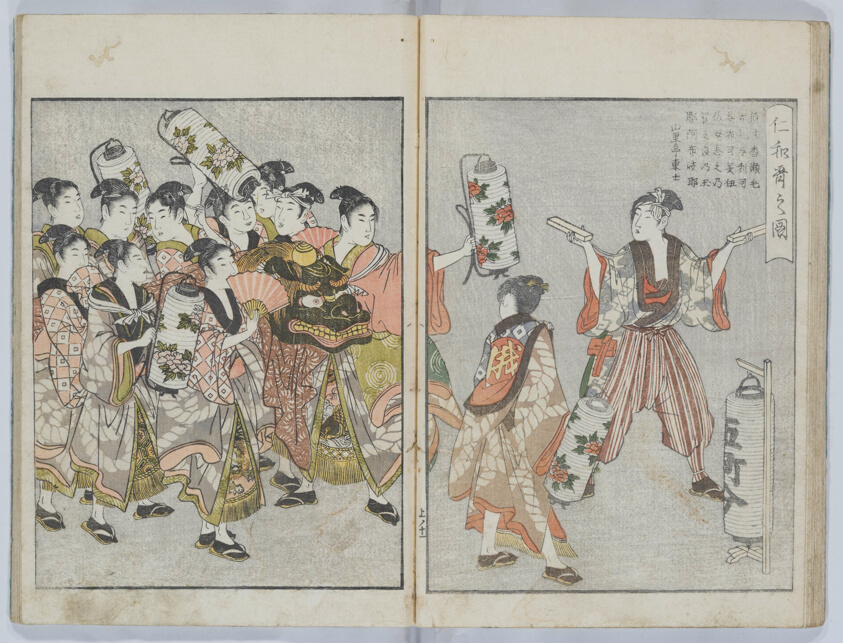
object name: Book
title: Yoshiwara Picture Book: Annual Events, or Annals of the Green Houses, (Seirō ehon nenjū gyōji)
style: Japanese (culture or style)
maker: Kitagawa Utamaro 喜多川 歌麿; Japanese, 1753 (?)-1806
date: 1804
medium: Color woodblock-printed book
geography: Japan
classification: book; woodblock print